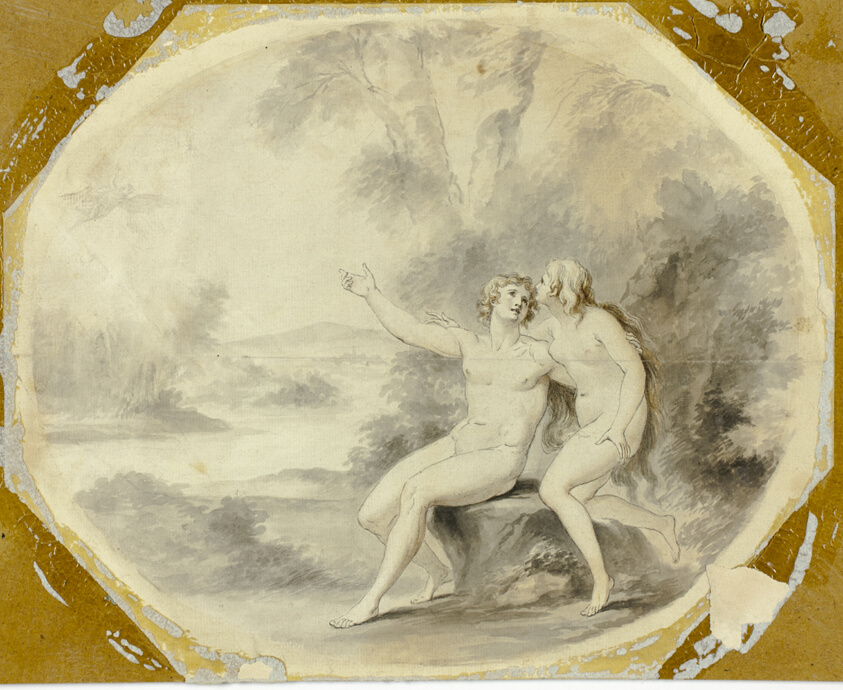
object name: Drawing and Watercolor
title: Adam and Eve in Paradise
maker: Giovanni Battista Cipriani (Italian, 1727-1785)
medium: Pen and black ink with brush and gray and brown wash, over traces of graphite, on ivory laid paper (hexagonal), laid down on board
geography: Italy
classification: ink or chalk wash; drawings (visual works); prints and drawing